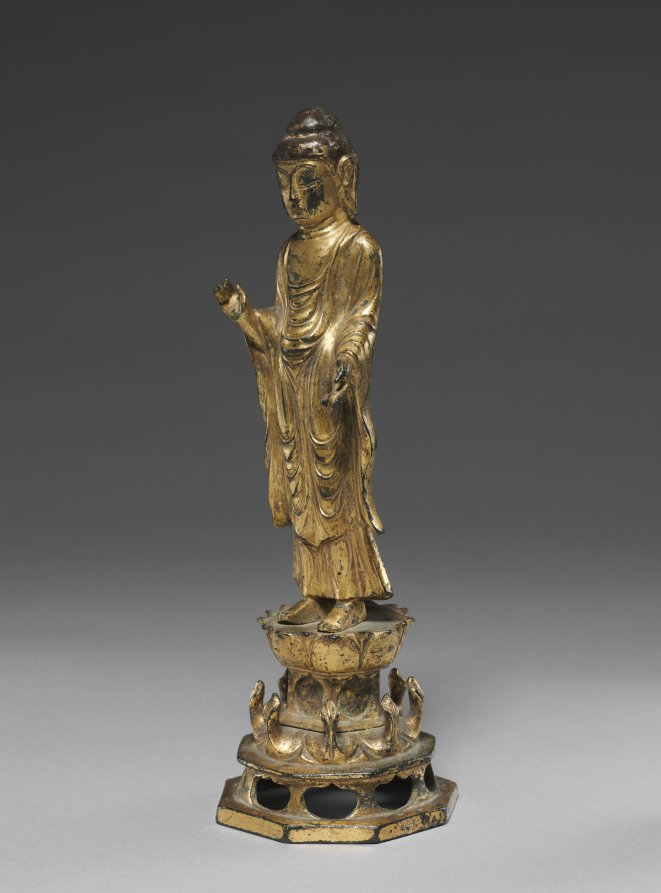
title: Statue of Amitabha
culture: Korea, Unified Silla period (676-935)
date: 800s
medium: gilt bronze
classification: Sculpture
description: This small sculpture shows Amitabha, the Buddha of the Western Paradise and the focus of the Pure Land sect of Buddhism, which was popular across East Asia, including Korea. This deity is recognizable from its right hand raised palm out in a gesture that reassures viewers to have no fear.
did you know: Small statues like this work were designed to be portable, rather than to be permanently housed in a Buddhist temple.